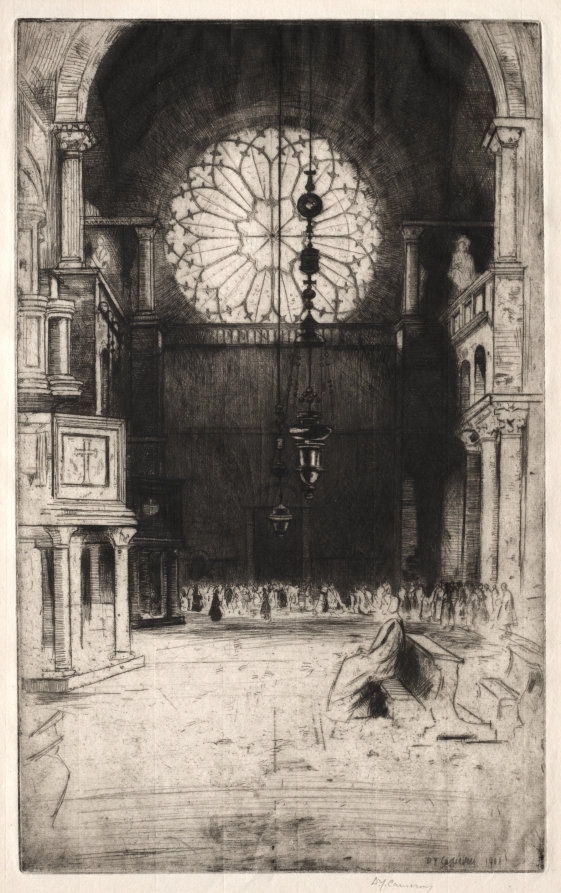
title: St. Mark's No. 2 (Venice) -- Interior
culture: England, early 20th Century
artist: David Young Cameron (British, 1865–1945)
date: 1900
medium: etching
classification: Print